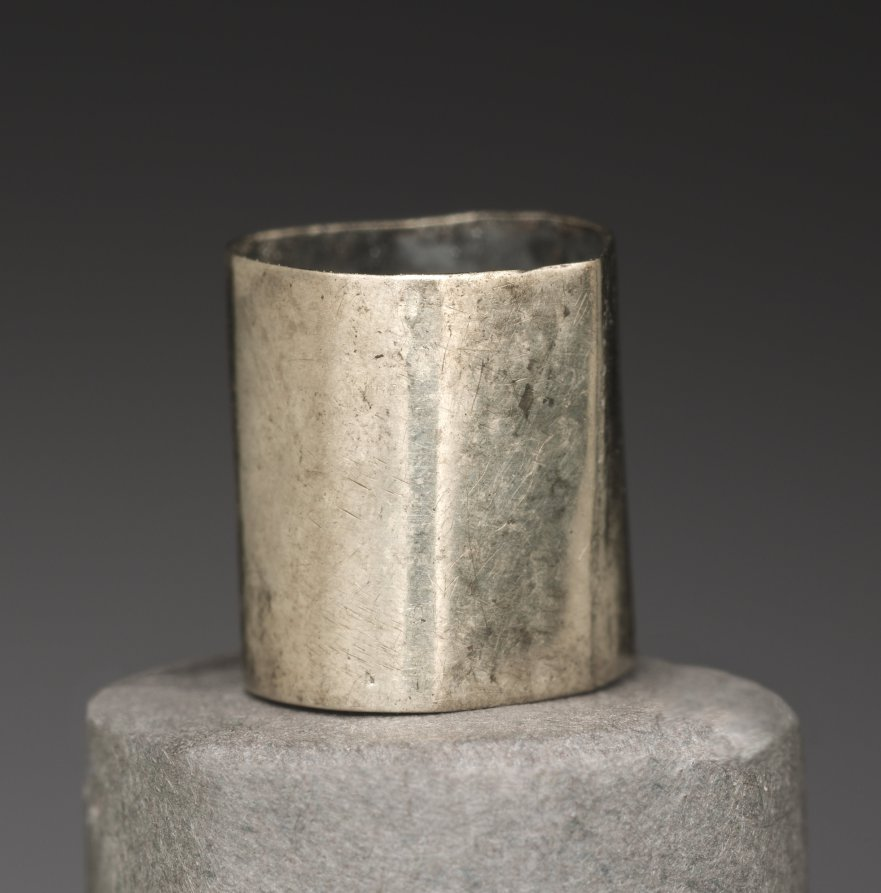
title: Element of Wig Decoration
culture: Egypt, Middle Kingdom (2040–1648 BCE), Dynasty 12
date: 1980–1801 BCE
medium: silver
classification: Jewelry